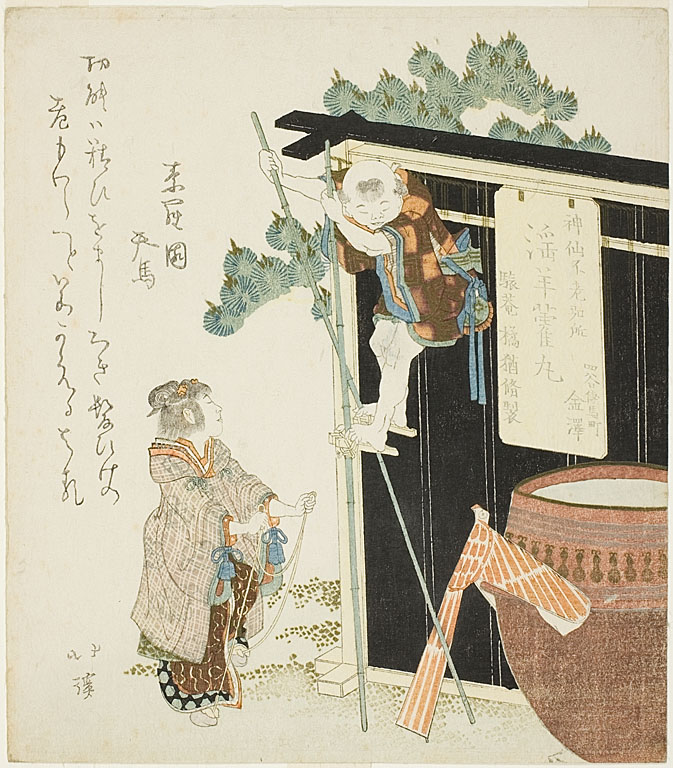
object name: Print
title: Children Playing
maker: Totoya Hokkei (Japanese, 1780-1850)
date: early 19th century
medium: Color woodblock print; surimono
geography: Japan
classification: woodblock print; print; asian art